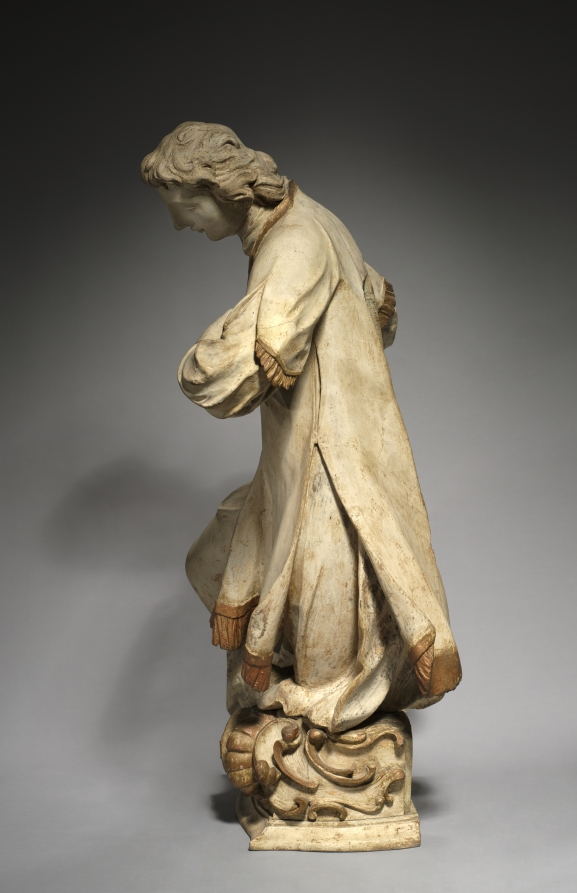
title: Kneeling Saint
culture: Germany, Munich, second half 18th century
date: 1750–1800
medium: painted and gilded wood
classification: Sculpture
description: This serene figure would originally have been part of a larger group, perhaps shown kneeling in adoration of Christ or the Virgin. He wears a knee-length dalmatic, the ecclesiastical dress of deacons (ordained ministers in the Catholic Church). Saints Lawrence and Stephen were among the most popular deacon saints, but lacking an identifying attribute—probably once attached to the saint’s outstretched hand—it is not possible to associate this figure with a specific saint.